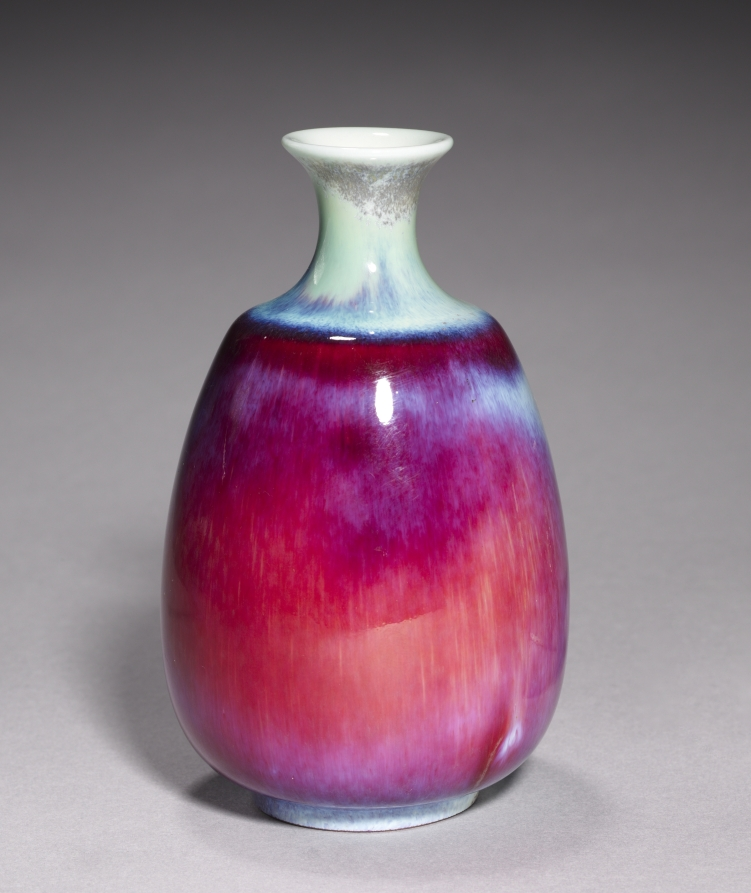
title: Vase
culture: Germany, Berlin, early 20th Century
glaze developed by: Hermann August Seger (German, 1839–1893)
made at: Royal Porcelain Manufactory, Berlin (German)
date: 1900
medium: porcelain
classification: Ceramic